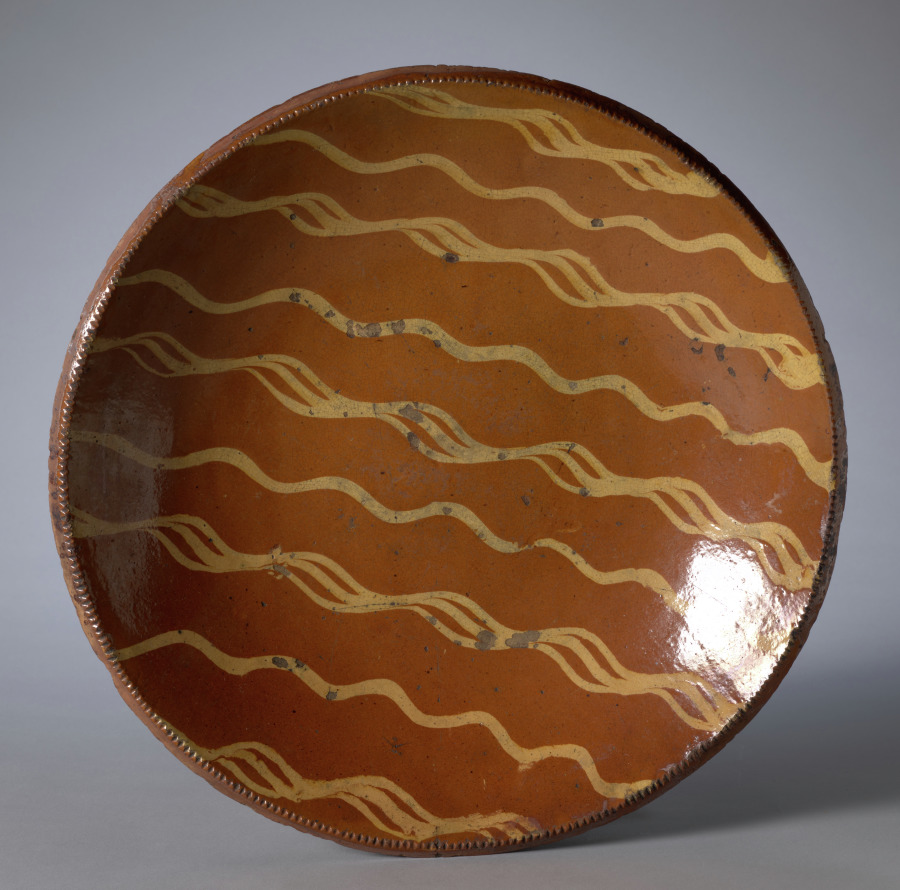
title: Slipware Dish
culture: America, Pennsylvania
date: early 1800s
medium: red terracotta with yellow and transparent glaze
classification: Ceramic